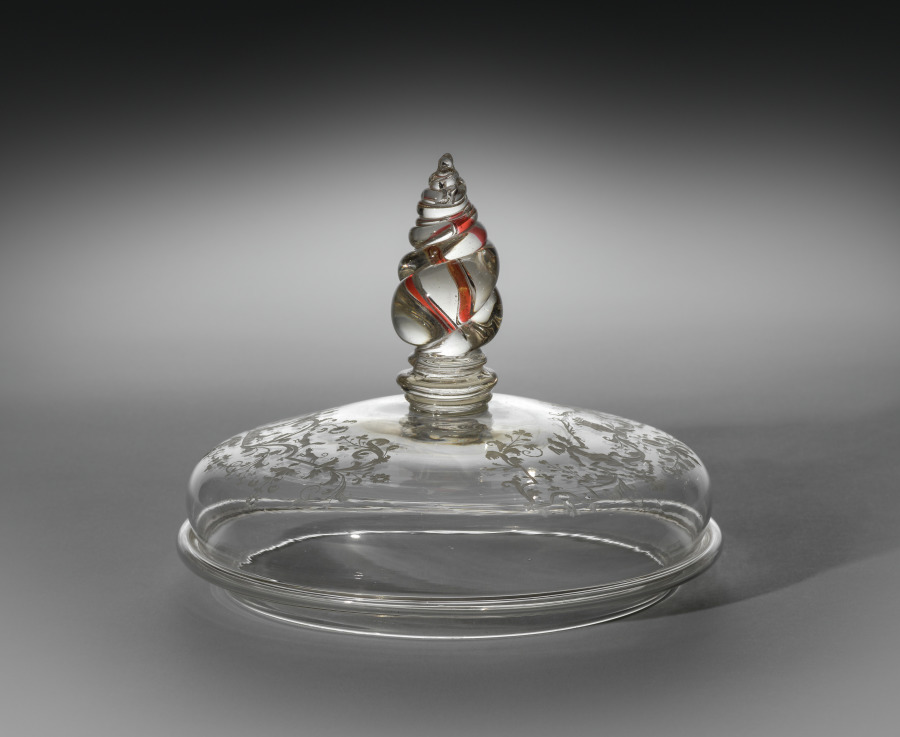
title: Cover for a Standing Cup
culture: Bohemia, 18th century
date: c. 1715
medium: glass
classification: Glass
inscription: the German inscription engraved around the hunting scene translates as: When sorrow torments us enjoy a glass of wine and also the joy of a hunt; engraved on the opposite side: F.A.K.J.P.V.C.F.Z.S. (Friedrich August Keonig in Polen und Chur Fuerst zu Sachsen).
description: Engraved with arms of Saxony-Poland and Hunting Scene.